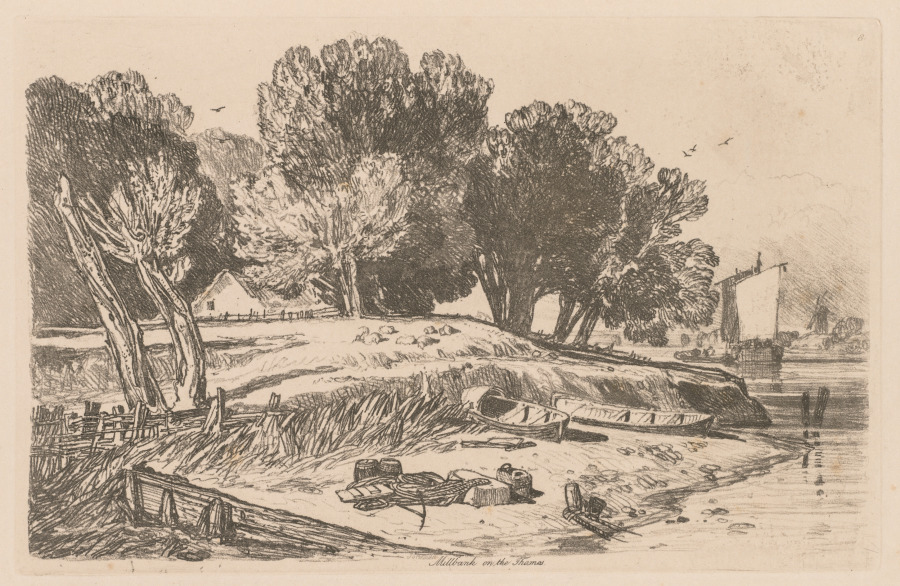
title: Liber Studiorum: Plate 8, Millbank on the Thames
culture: England, 19th century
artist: John Sell Cotman (British, 1782–1842)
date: 1838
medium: softground etching, from a bound volume containing 48 plates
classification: Bound Volume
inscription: In plate, within image, upper right: 8; in plate, below image: Millbank on the Thames